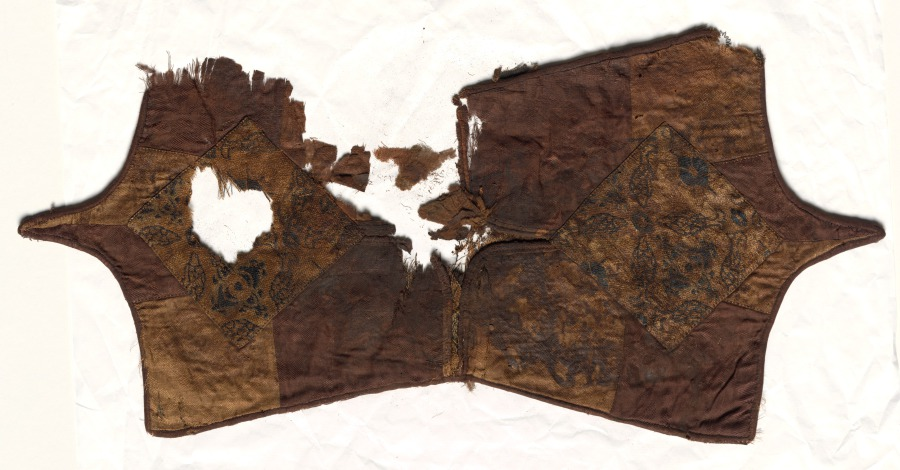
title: Object (Purpose Unknown)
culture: China, Liao dynasty (907-1125)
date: 907–1125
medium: damask; compound twill; silk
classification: Textile